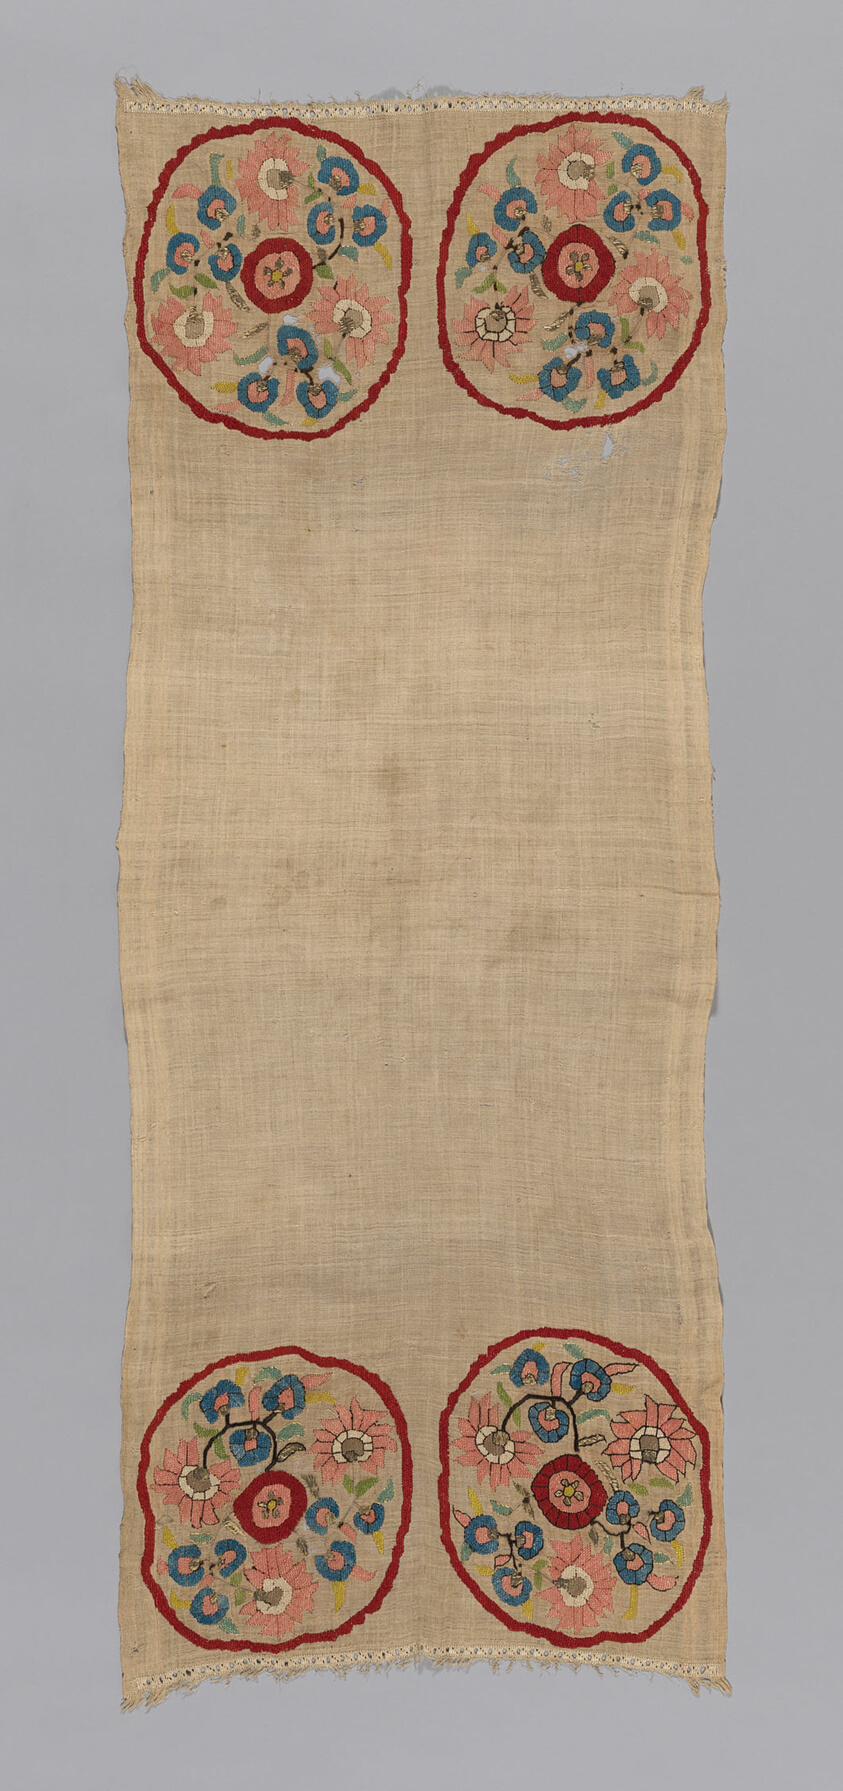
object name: Costume and Accessories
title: Sash (?)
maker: Turkey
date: 18th century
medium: Embroidered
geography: Turkey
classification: textile; weaving; needlework (visual works); costume